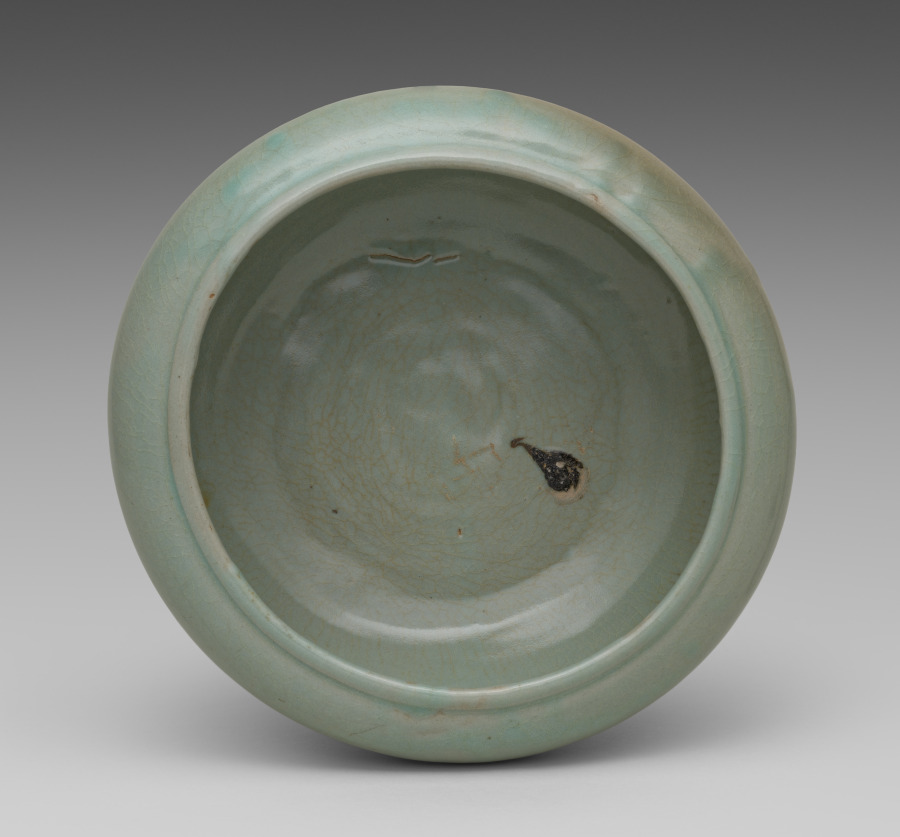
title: Bowl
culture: Korea, Goryeo dynasty (918–1392)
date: 1100s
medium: celadon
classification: Ceramic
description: As early as the seventh century, the practice of drinking tea became an important part of elite culture in Korea. In enjoying teas, elites commissioned a variety of types of utensils and vessels including this large bowl, not only to make their tea-drinking experience more exciting, but also to show their refined taste.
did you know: The distinctive bluish and greenish glaze of Goryeo celadons, shown in this bowl, is the result of distinctive small and long Korean kilns, which maintained a low oxygen saturation with a high level of carbon dioxide.